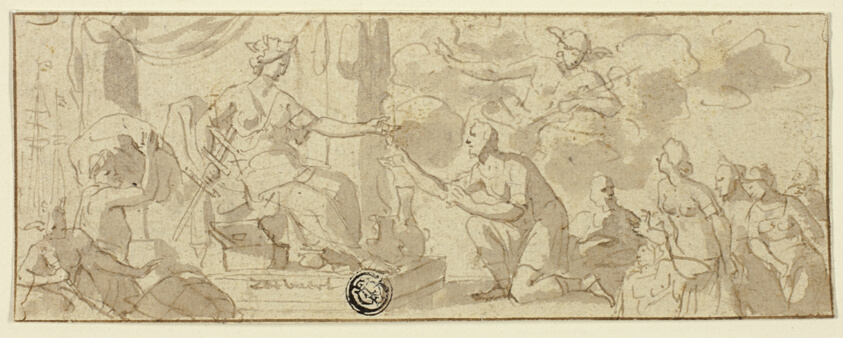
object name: Drawing and Watercolor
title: Allegory of Navigation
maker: Jan Luyken (Dutch, 1649-1712); or Anthonie Palamedesz (Dutch, 1601-1673); or the circle of Jan Luyken (Dutch, 1649-1712)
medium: Pen and brown ink, with brush and brown wash, on buff laid paper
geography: Holland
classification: ink or chalk wash; drawings (visual works); prints and drawing